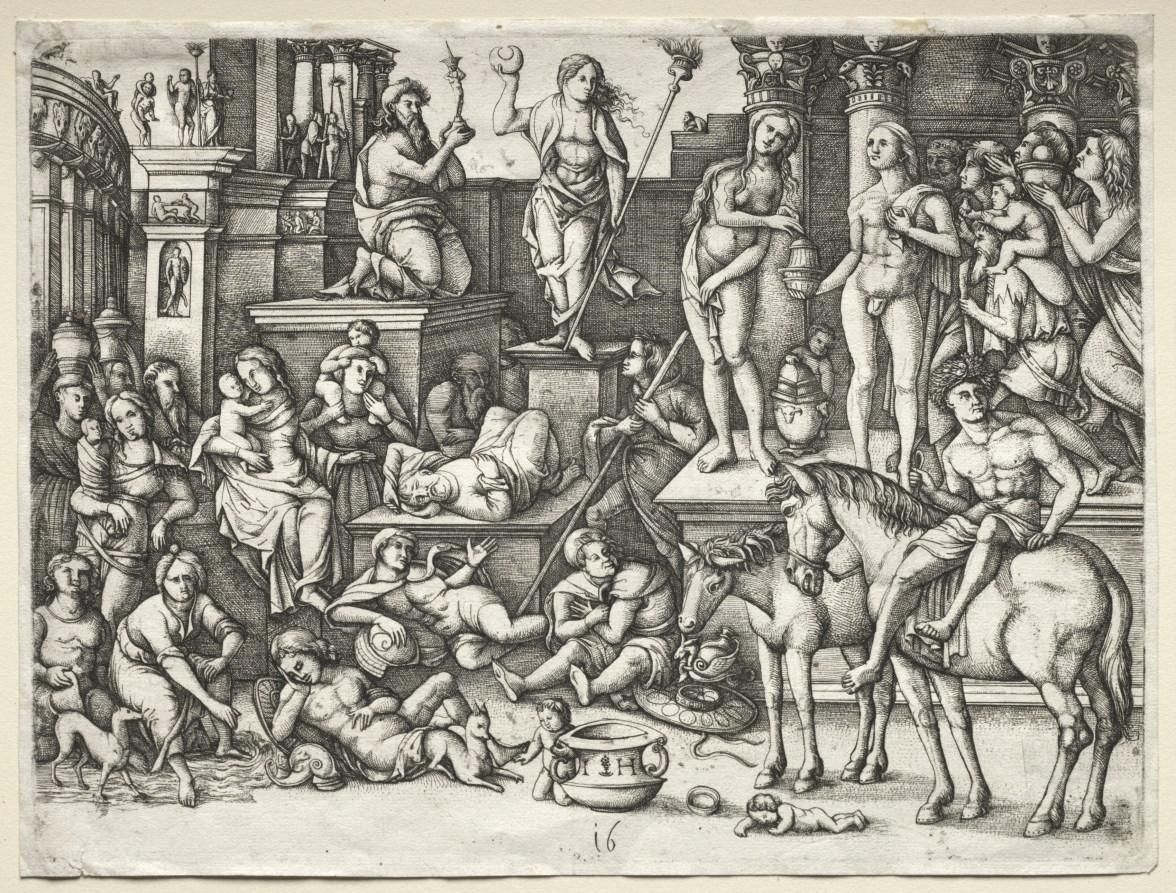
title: The Power of Love, or, Worship of Luna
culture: Germany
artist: Hieronymus Hopfer (German)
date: 1528–63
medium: engraving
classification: Print